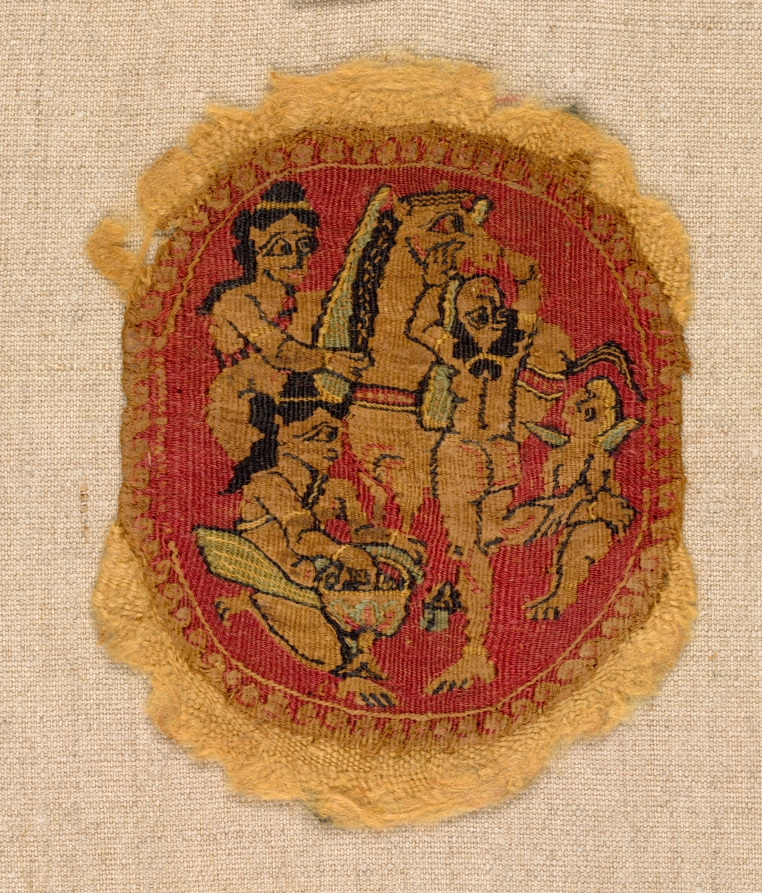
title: Five Round Segmenta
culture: Egypt, Umayyad period (661–750)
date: 650 – 750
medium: tapestry weave: wool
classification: Textile